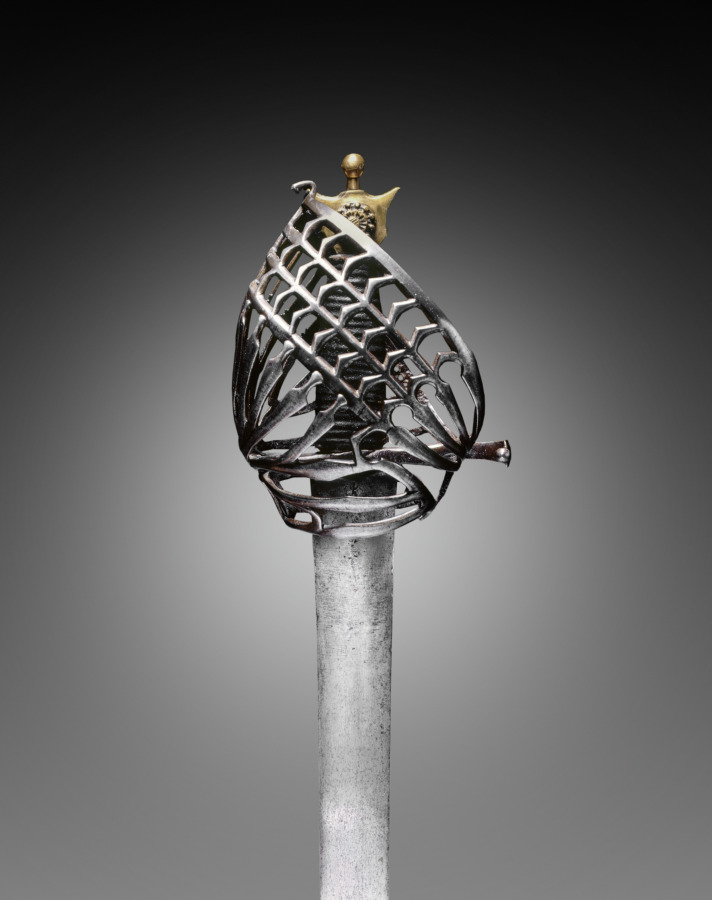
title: Schiavona Broadsword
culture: Italy, Venice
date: early 1700s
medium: steel, leather, wood, brass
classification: Arms and Armor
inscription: blade inscribed: POTZDAM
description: The schiavona-type broadsword features a complex barred guard that slopes forward. Its name derives from the Italian word for "Slavonic" and refers to the Slavonian corps who served as bodyguards to the Doge of Venice until the end of the Venetian Republic in 1797. Such swords were popular mainly with Venetians.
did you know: Usually used by the military, a broadsword has a straight, wide, two-edged blade a with basket-shaped guard that helps protect the hand.